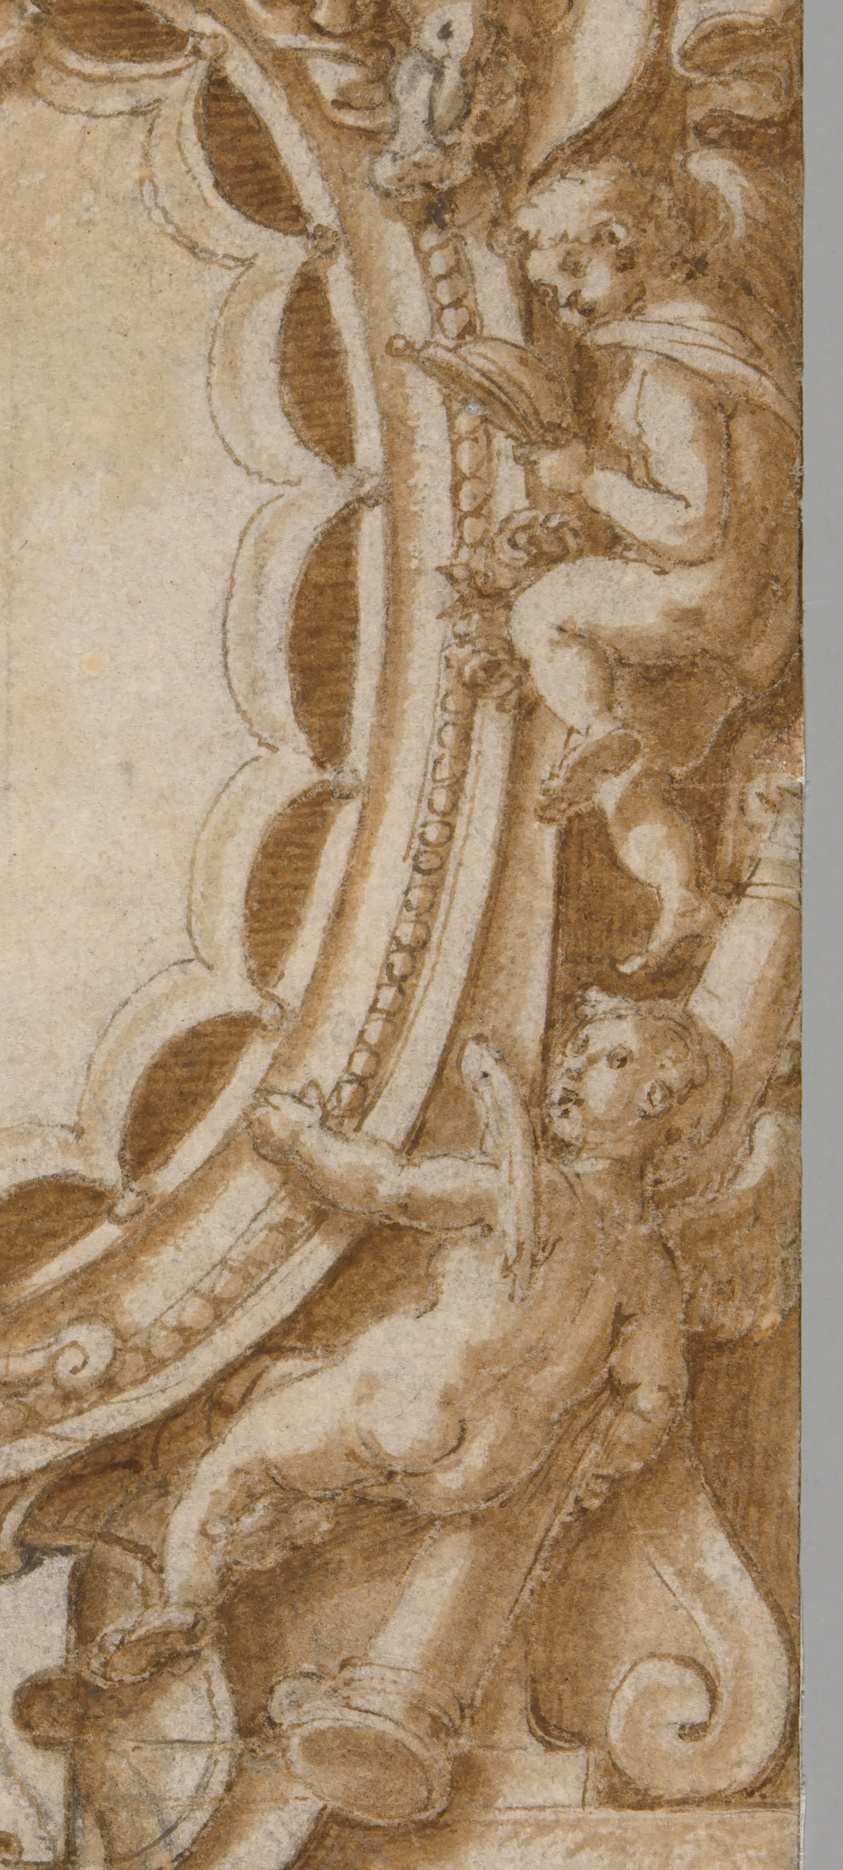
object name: Drawing and Watercolor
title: Design for Frontispiece to the Seven Virtues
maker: Joannes Stradanus, called Giovanni Stradano; Flemish, 1523-1605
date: 1598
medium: Pen and brown ink and brush and brown wash, with touches of opaque white watercolor, over traces of black chalk, on cream laid paper, incised for transfer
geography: Flanders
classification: ink with wash; drawings (visual works); prints and drawing